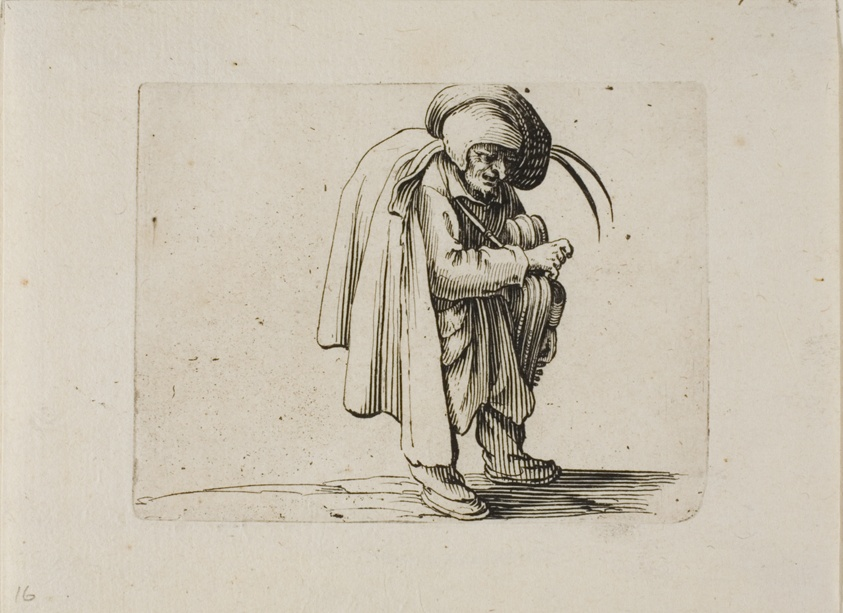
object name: Print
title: The Hurdy-Gurdy Player, from Varie Figure Gobbi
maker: Jacques Callot (French, 1592-1635)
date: 1616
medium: Etching on paper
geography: France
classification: etching; print; prints and drawing